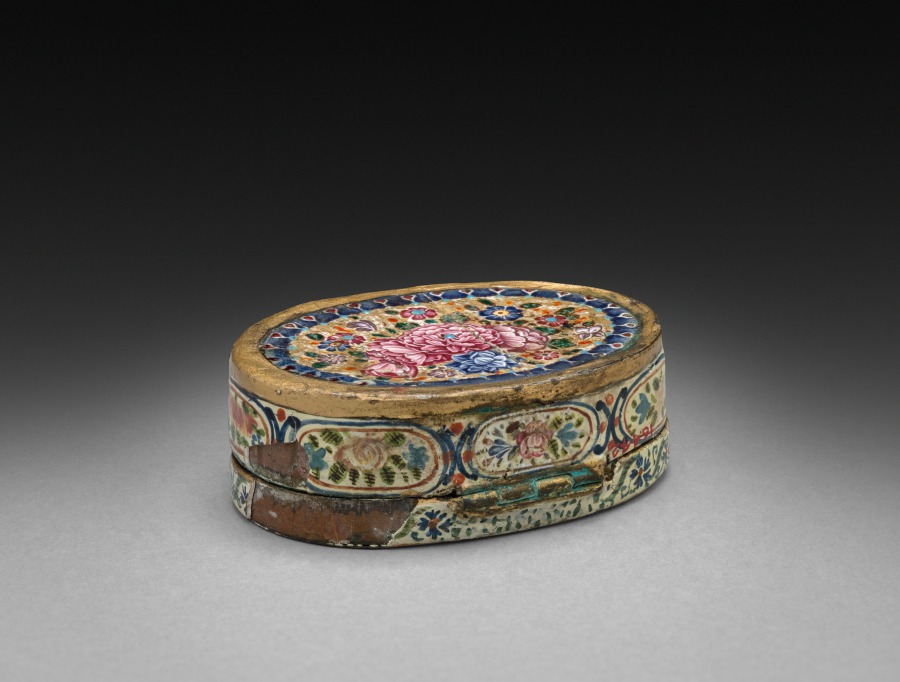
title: Box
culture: China, Qing dynasty (1644-1911) or Republican period (1912-49)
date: 1900–1916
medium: enamel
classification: Enamel